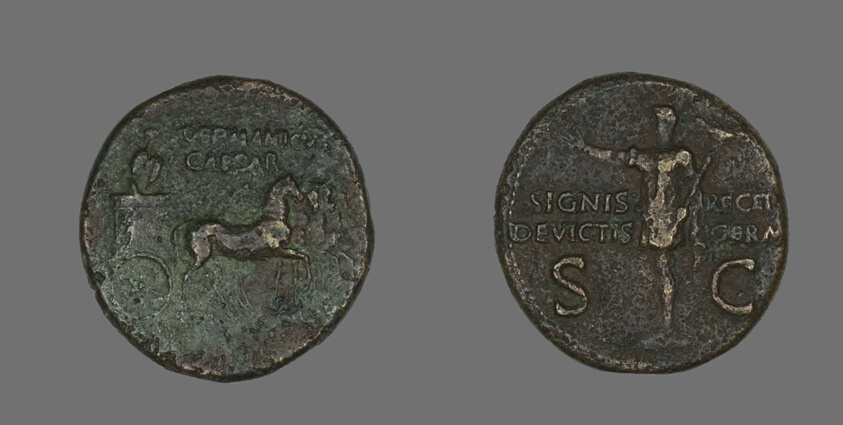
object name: Coin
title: Dupondius (Coin) Portraying Germanicus Caesar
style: roman (ancient, style or period), ancient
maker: Roman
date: 15 BCE-19 CE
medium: Bronze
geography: Roman Empire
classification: coin; ancient art